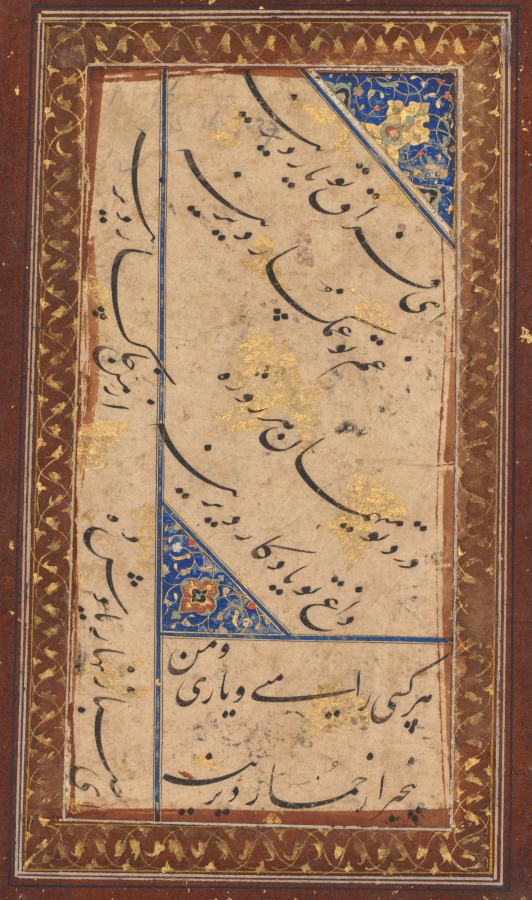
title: Calligraphy of a ghazal of Amir Khusrau Dihlavi (Indian, 1253–1325) (verso)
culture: India, Farrukhabad, Mughal, 18th century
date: c. 1760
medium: Gum tempera, ink, and gold on paper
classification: Calligraphy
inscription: verso: six lines of Persian poetry in nast 'aliq calligraphy